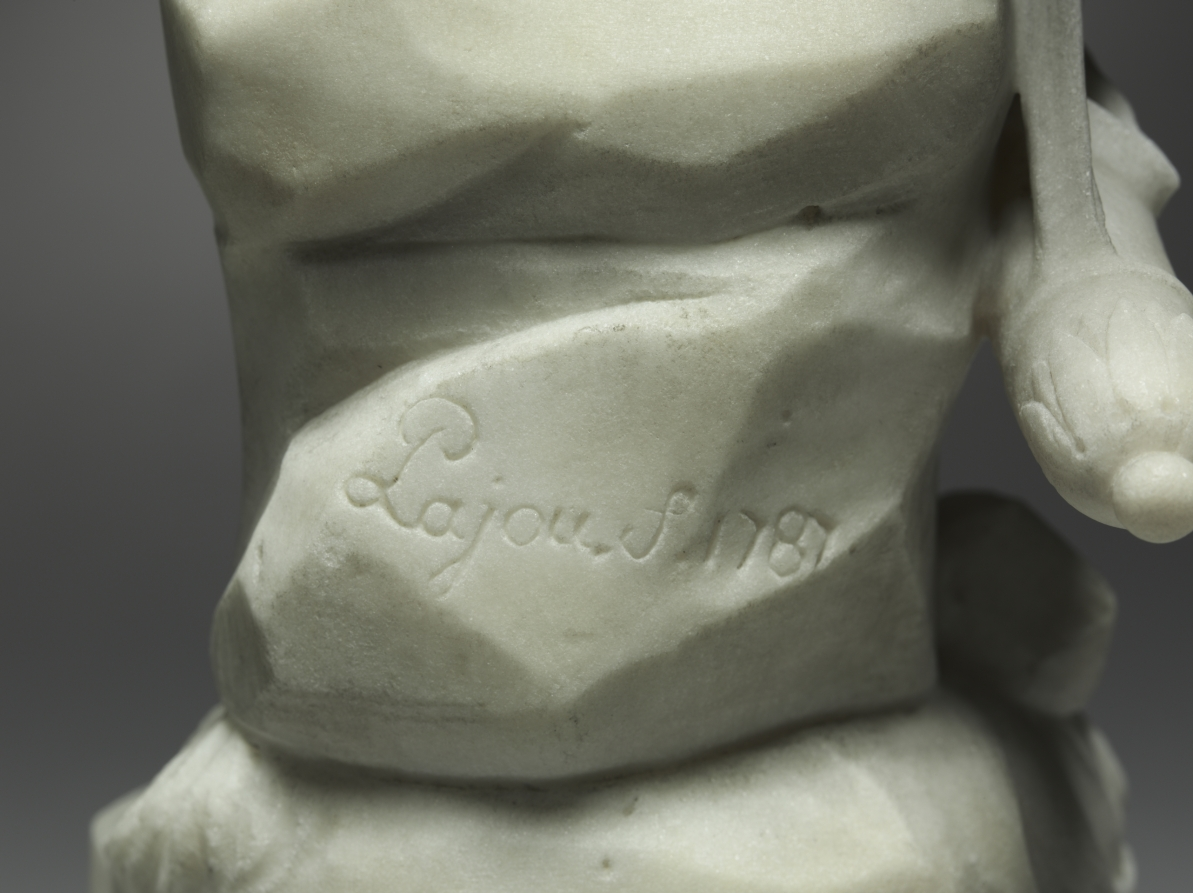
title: Fickle Love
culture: France, 19th century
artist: after Augustin Pajou (French, 1730–1809)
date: 1800s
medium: marble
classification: Sculpture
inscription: Signed Pajou f (fecit) 1787